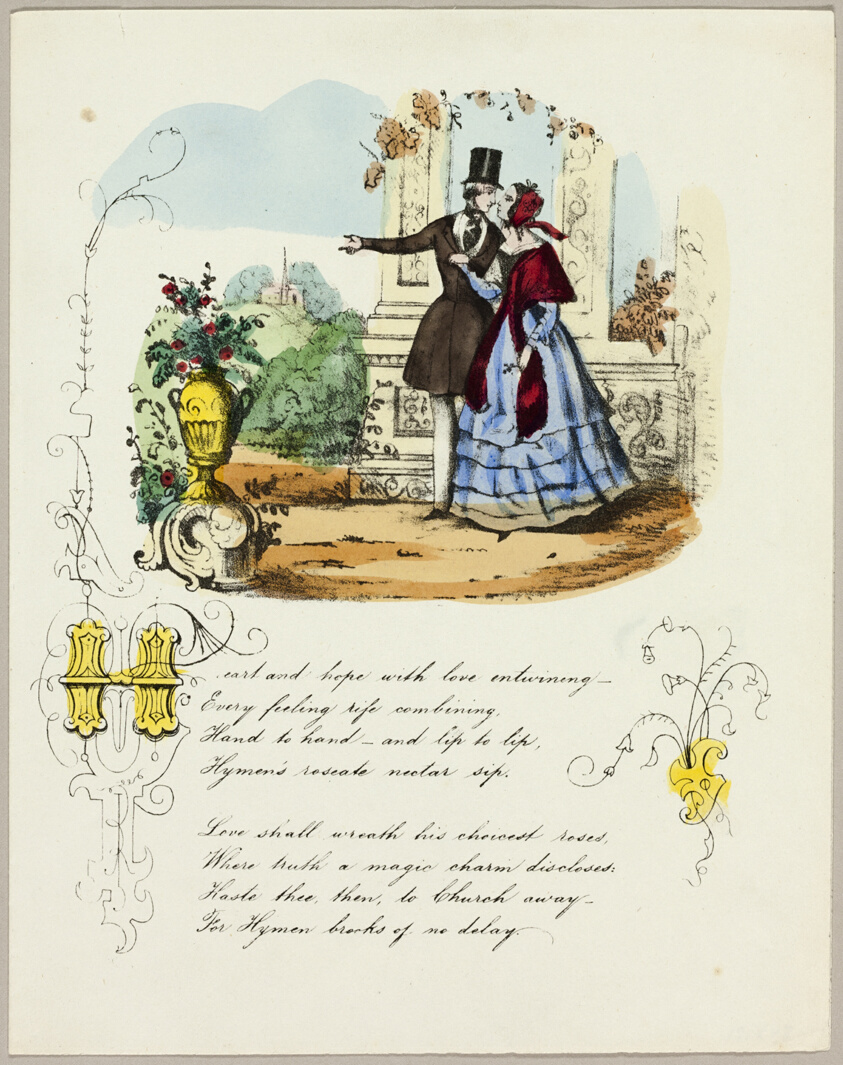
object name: Print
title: Heart and Hope with Love Entwining (valentine)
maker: Unknown Artist; English, 19th century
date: c. 1842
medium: Lithograph with hand-coloring on ivory wove paper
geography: England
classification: valentine; prints and drawing; print